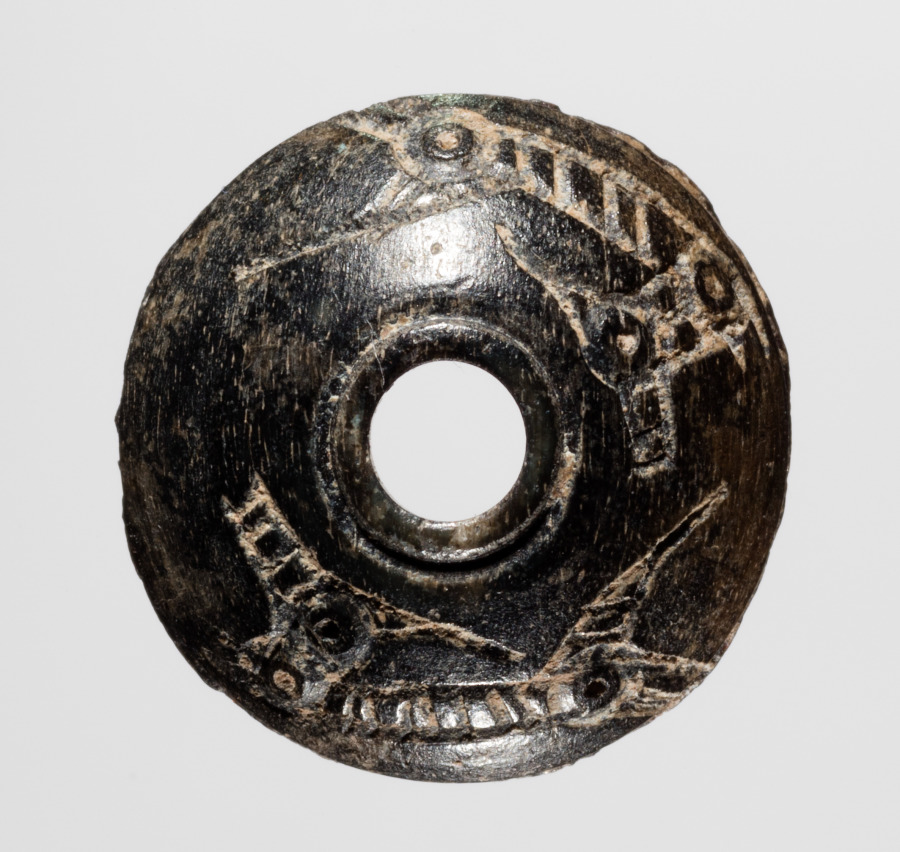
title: Spindle Whorl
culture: Iran, early Islamic period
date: 700s - 900s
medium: bone, incised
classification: Spindle Whorl